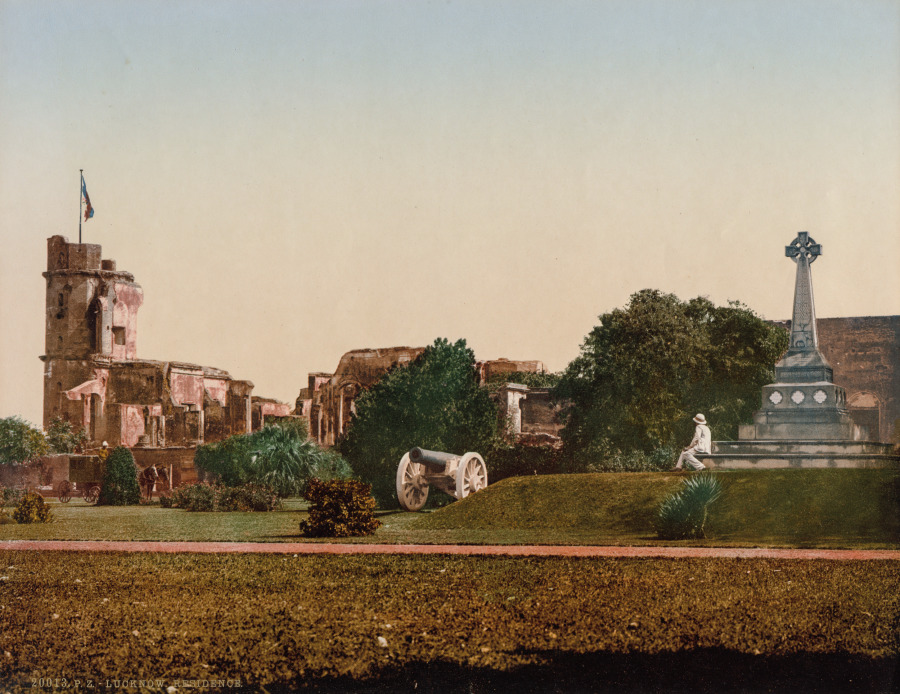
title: Lucknow. Residence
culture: India, 19th century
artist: Photoglob Co. (Zurich, active c. 1890–1910)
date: 1890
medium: Photochrom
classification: Photograph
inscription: Imprinted in gold on recto in lower left corner: “20013. P.Z.-LUCKNOW. RESIDENCE”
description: The Residence, several buildings that housed and served colonial officials, was put under siege during the Indian Rebellion of 1857 against the British East India Company. The British regained control in 1858 but left the ruins as a memorial to their fallen compatriots.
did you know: Photochrom is an ink-based process that produces color images from black-and-white photographic negatives.